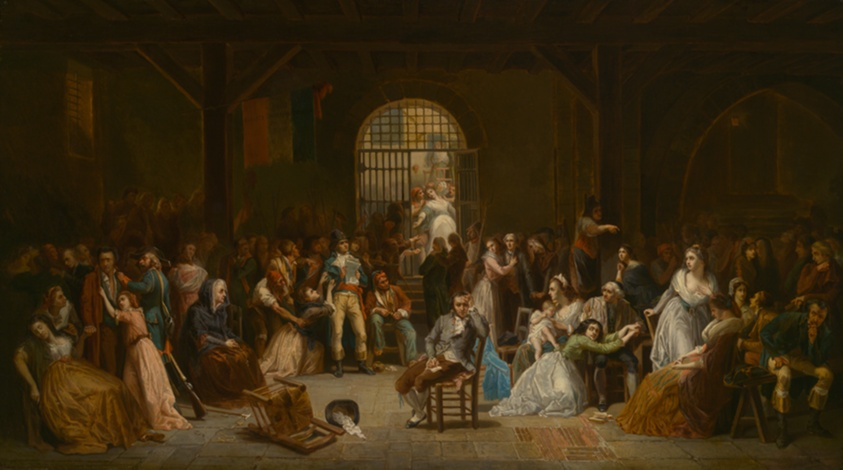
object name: Painting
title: The Roll Call of the Last Victims of the Terror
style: france, 17th Century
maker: Charles Louis-Lucien Muller (French, 1815–1892)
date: c. 1850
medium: Oil on canvas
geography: France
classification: painting; paint; oil paintings (visual works); french; european painting; france; oil on canvas; war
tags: terror, men, women, children, chair, soldiers, books, woman with children, babies, chairs, dresses, France, French, prisoners, prisons, roll call, suits, textiles